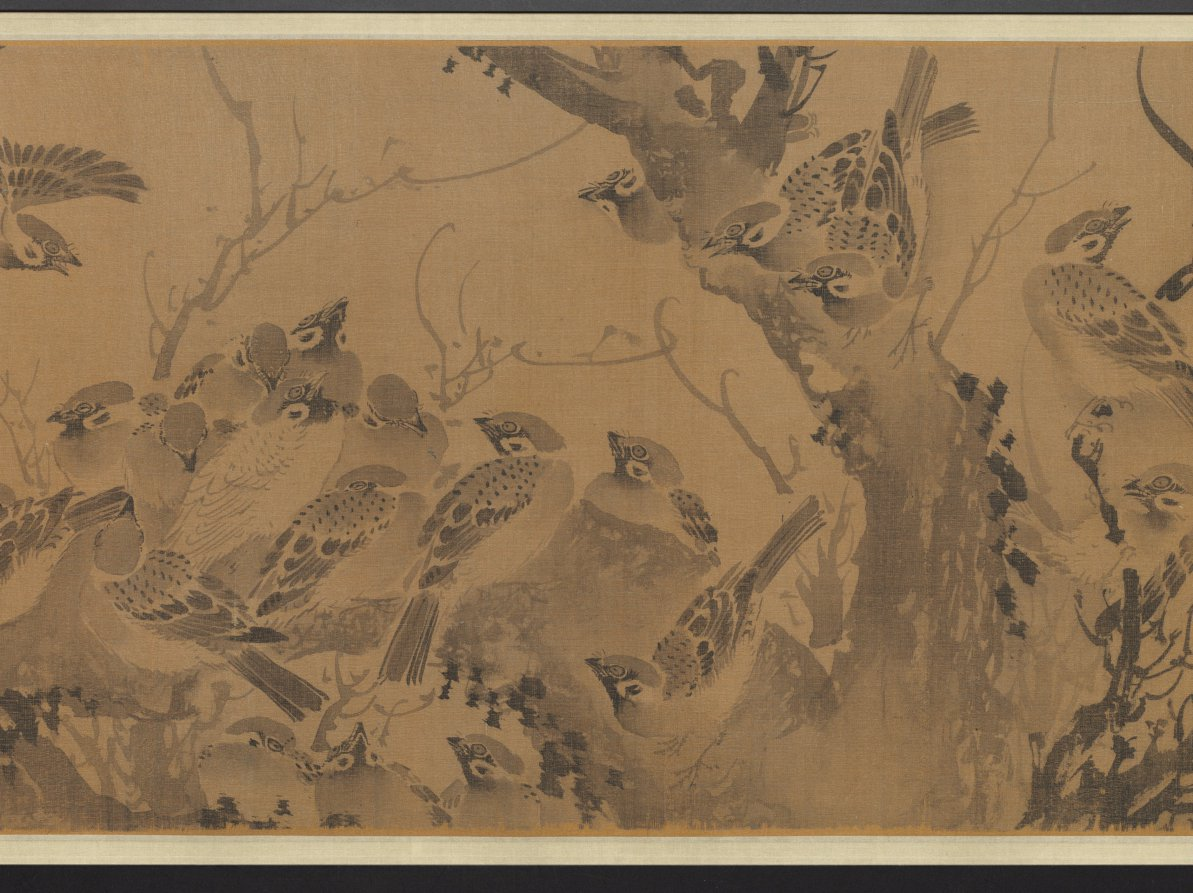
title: A Hundred Sparrows in a Lofty Grove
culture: China, Ming dynasty (1368–1644)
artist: attributed to Lin Liang (Chinese, 1416–1480)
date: 1368–1644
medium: handscroll; ink on silk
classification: Painting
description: Sparrows engaged in all kinds of activities frolic amid leafy branches, blades of grass, rocks, and a waterfall. As our eyes move over the scroll, the artist engages us in enjoying the sparrows’ carefree movements in a natural setting. The charming birds were painted from close observation in swift and fluent brushstrokes. Sparrows are a common bird and in Chinese painting they often represent the commoner in human society as opposed to the noble pheasant or peacock representative of the ruling class.